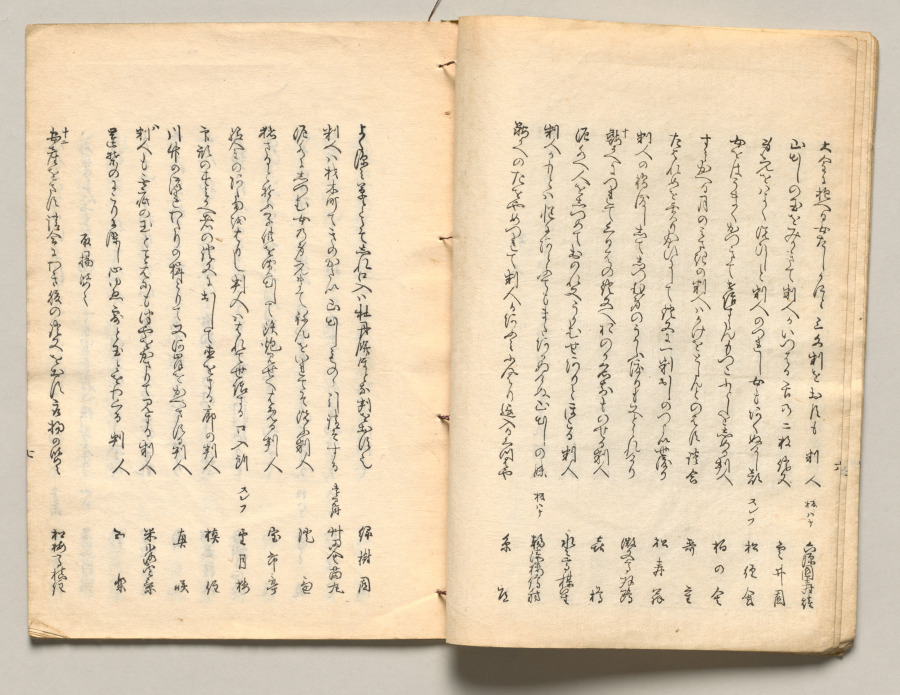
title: Spread Fifteen from Volume Four of People of Japan in Light Verse (Kyōka)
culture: Japan, Edo period (1615–1868)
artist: Utagawa Hiroshige (Japanese, 1797–1858)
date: 1857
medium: Woodblock-printed book; ink and color on paper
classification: Bound Volume